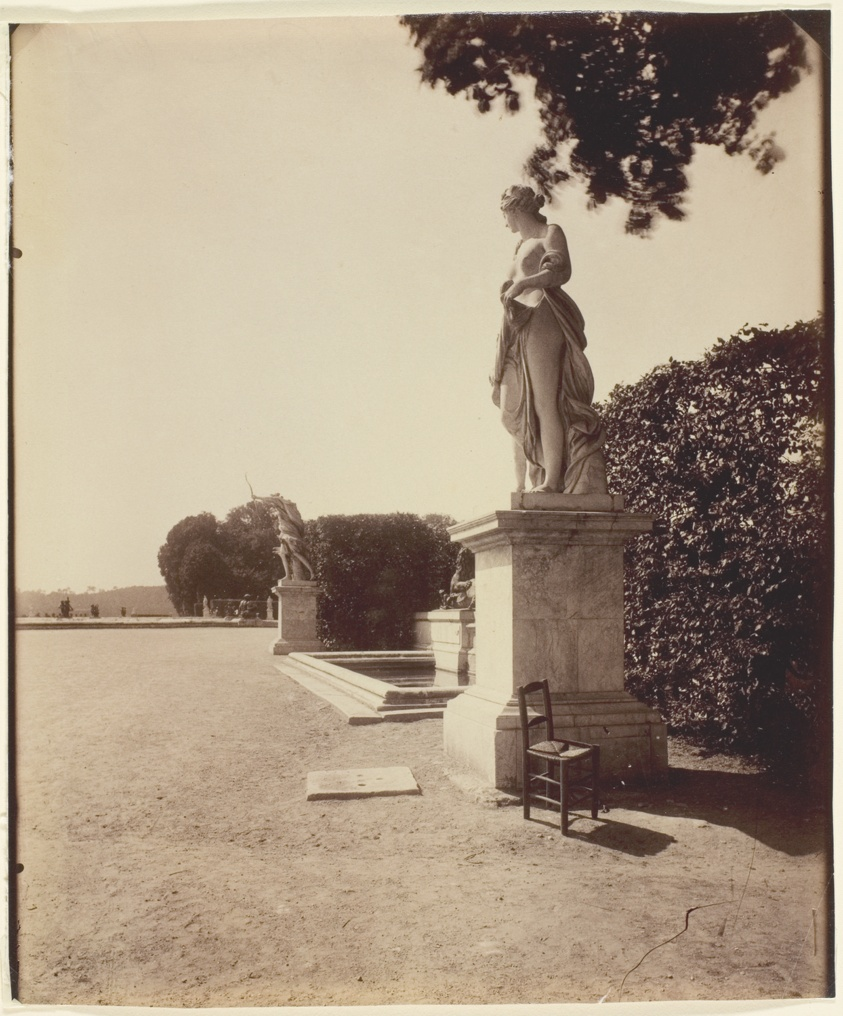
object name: Photograph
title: Versailles, Coin de Parc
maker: Jean-Eugène-Auguste Atget (French, 1857–1927)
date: 1903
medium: Albumen print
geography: France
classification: albumen silver print; photographic process; photography; photograph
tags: Collected by Hugh Edwards